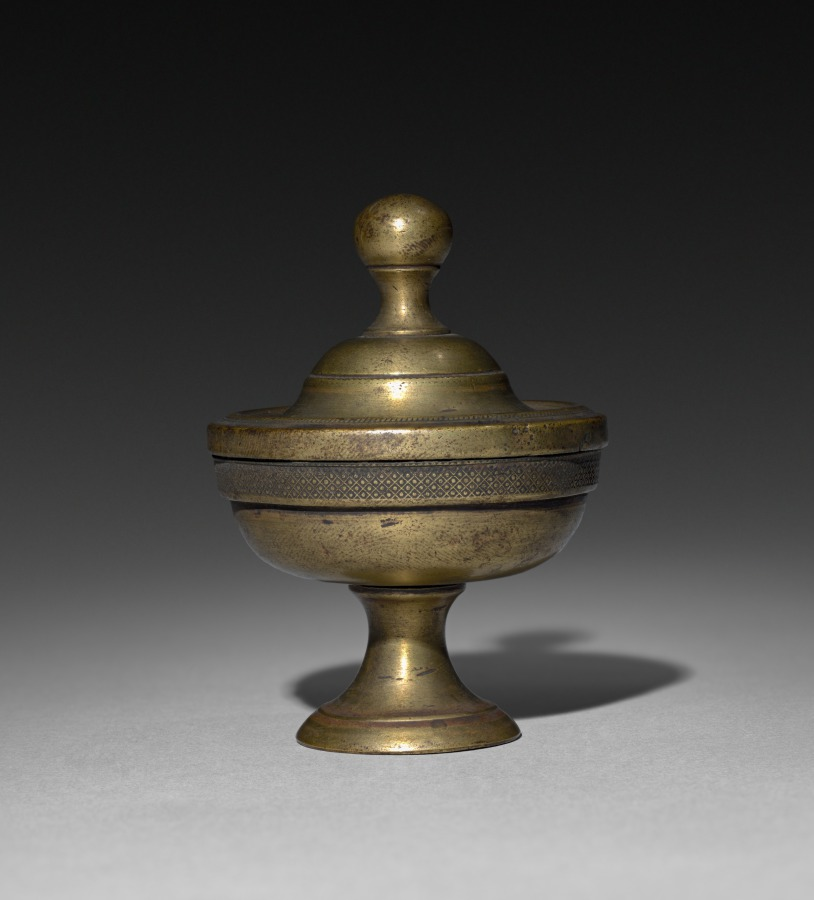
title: Ornamental Finial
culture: France, early 19th century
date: early 1800s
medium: bronze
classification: Metalwork